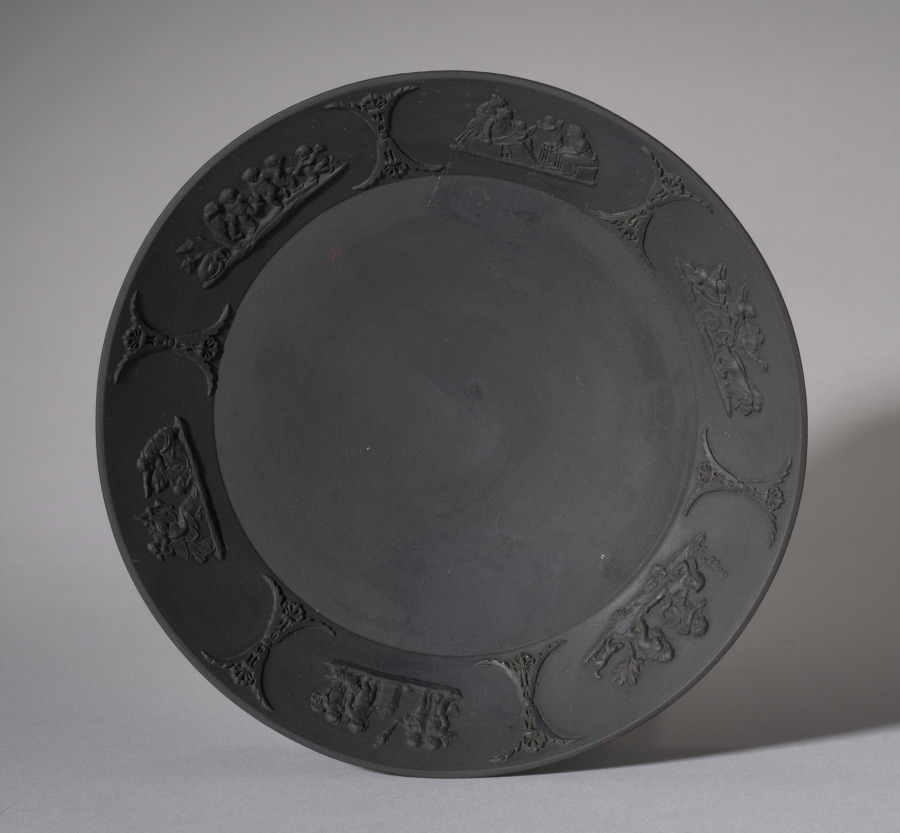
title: Saucer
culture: England, Staffordshire, 19th century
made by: Wedgwood Factory (British)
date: 1800s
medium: black basalt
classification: Ceramic